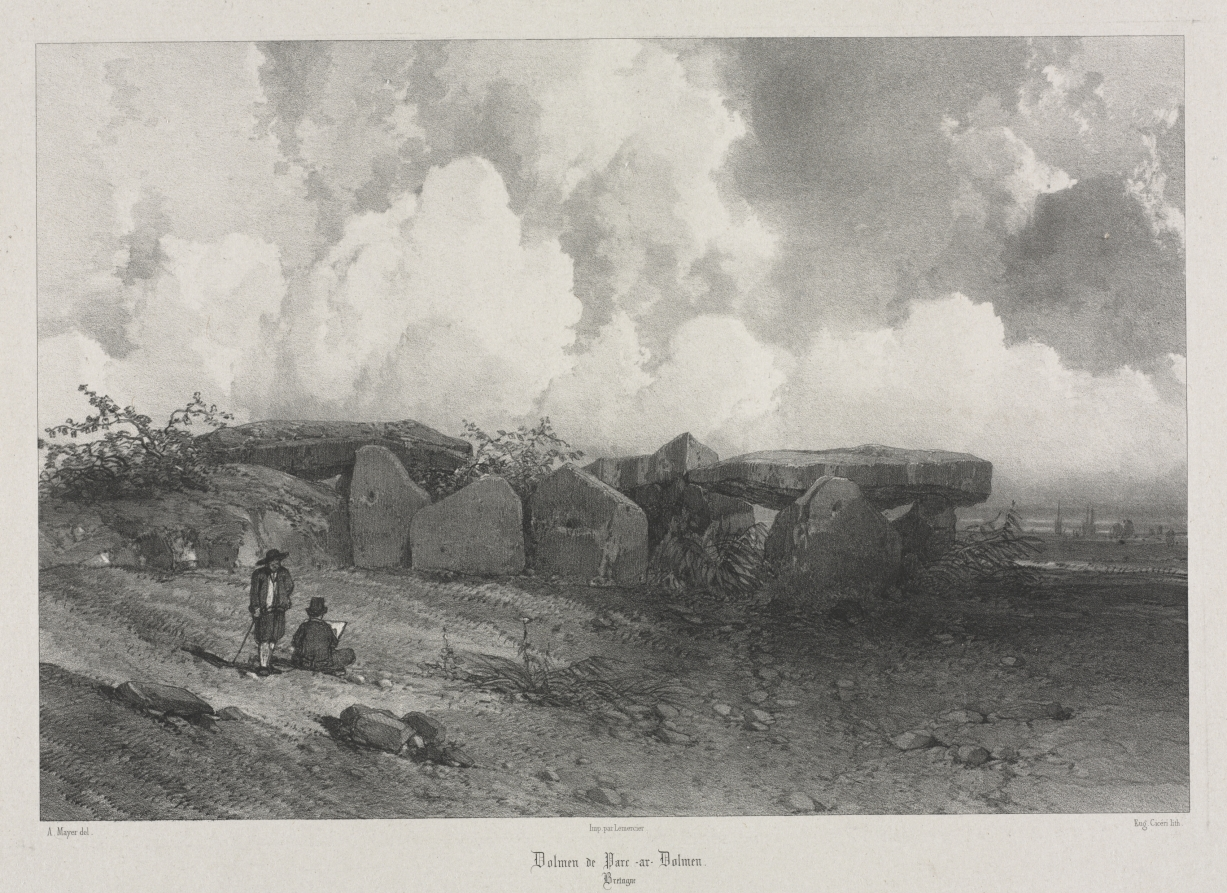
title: Voyages pittoresques et romantiques dans l'ancienne France: Bretagne: Dolmen de Parc-ar-Colmen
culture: France, 19th century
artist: Eugène Cicéri (French, 1813–1890)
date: c. 1845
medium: lithograph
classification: Print